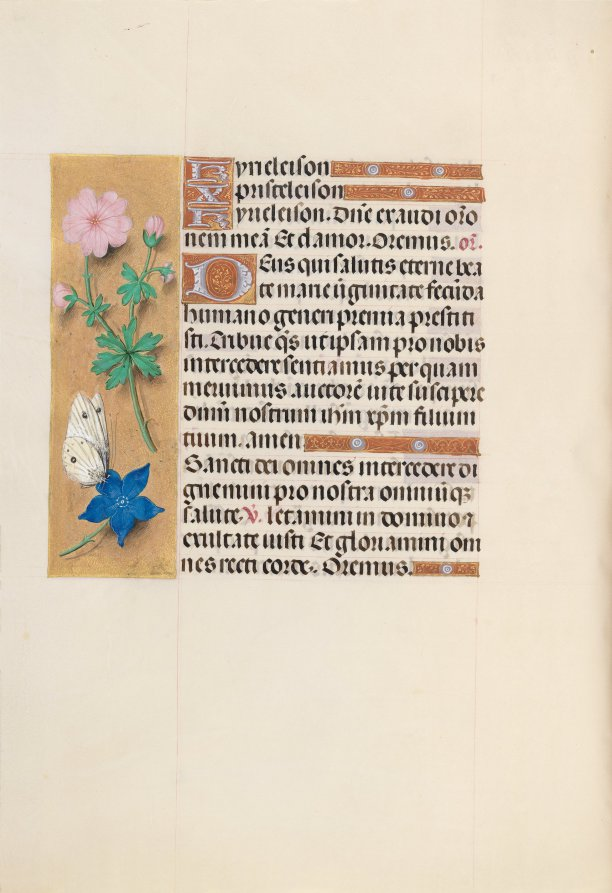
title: Hours of Queen Isabella the Catholic, Queen of Spain: Fol. 134v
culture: Flanders, Ghent and Bruges, late 15th century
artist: Master of the First Prayerbook of Maximillian (Flemish, c. 1444–1519)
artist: and Associates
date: c. 1500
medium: ink, tempera, and gold on vellum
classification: Bound Volume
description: This manuscript was illuminated by a circle of at least five highly organized manuscript painters active in the Flemish cities of Ghent and Bruges. The principal illuminator was Alexander Bening, who painted the majority of the book's miniatures. Manuscripts produced by this circle of artists are renowned for the decoration of their borders, which typically feature a rich variety of realistically-painted flowers, birds, and butterflies. This prayer book, called a book of hours, was intended not for a cleric, but for the private devotions of a lay person-in this case, Isabella the Catholic, Queen of Spain (1451-1504). Isabella's coat of arms embellishes the book's frontispiece. It is unlikely that the book was commissioned by the Queen herself; rather, she probably received it as a diplomatic gift from someone courting her patronage, perhaps Cardinal Francisco Jimenez de Cisneros. A Franciscan friar, Jimenez was dependent upon Isabella for his advancement, first to the post of Queen's confessor in 1492, and then to Archbishop of Toledo in 1495.